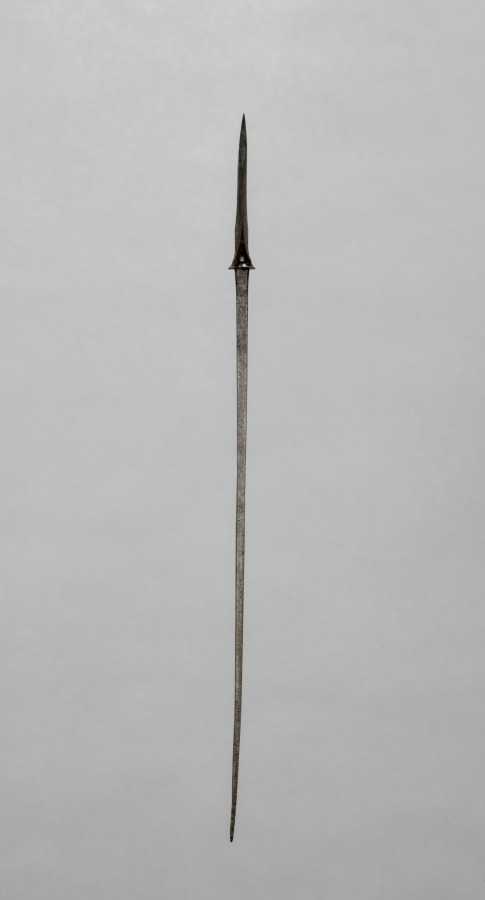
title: Arrow Point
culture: Japan, Edo period (1615–1868)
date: 1700s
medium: steel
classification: Arms and Armor